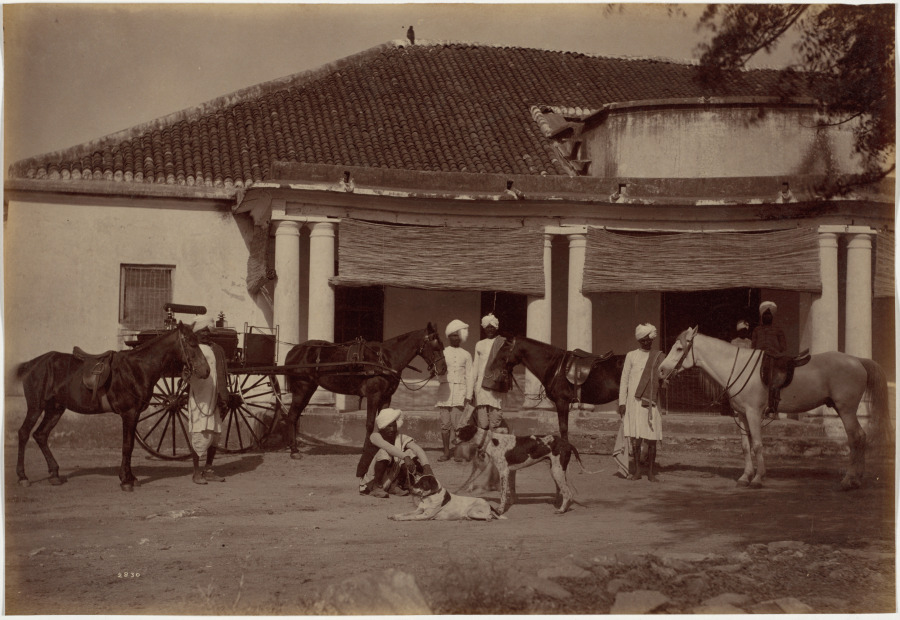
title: Mr. Brown's Horses, Jhansi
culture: India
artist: Raja Deen Dayal (Indian, 1844–1905)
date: 1887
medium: albumen print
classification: Photograph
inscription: No visible inscriptions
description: Imported into India in great numbers by the British, horses were used for both transportation and sports such as riding, polo, and racing. Caring for the animals fell largely to Indian servants. Captions on the photographs’ mounts specify the owners of these animals (note that Major Sparks also has a monkey and pet deer). However, none of the Indian servants is identified. Nor would they have received a copy of the photograph because of their low social status, which was far below that of Deen Dayal.